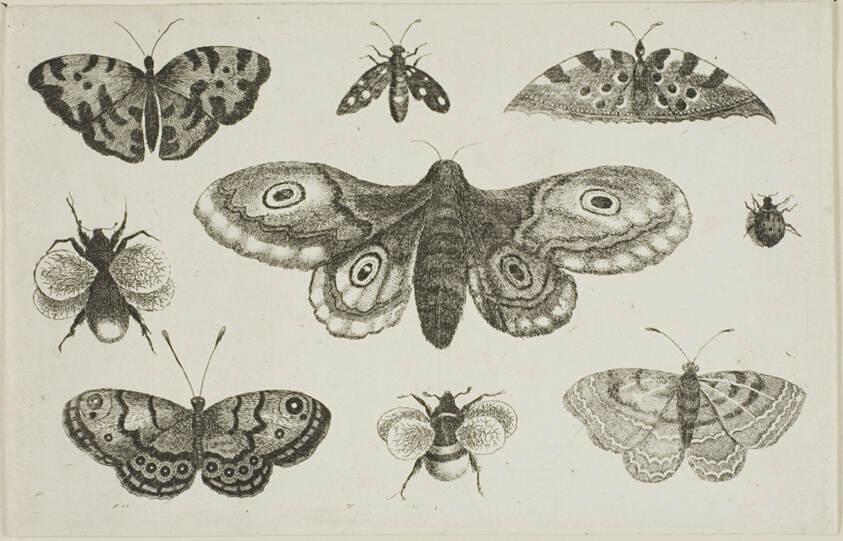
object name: Print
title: A Moth, Butterflies, and Bees, from Diversae Insectorum...Figurae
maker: Wenceslaus Hollar (Bohemian, 1607-1677)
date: after 1644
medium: Etching on ivory laid paper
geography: Bohemia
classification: etching; print; prints and drawing